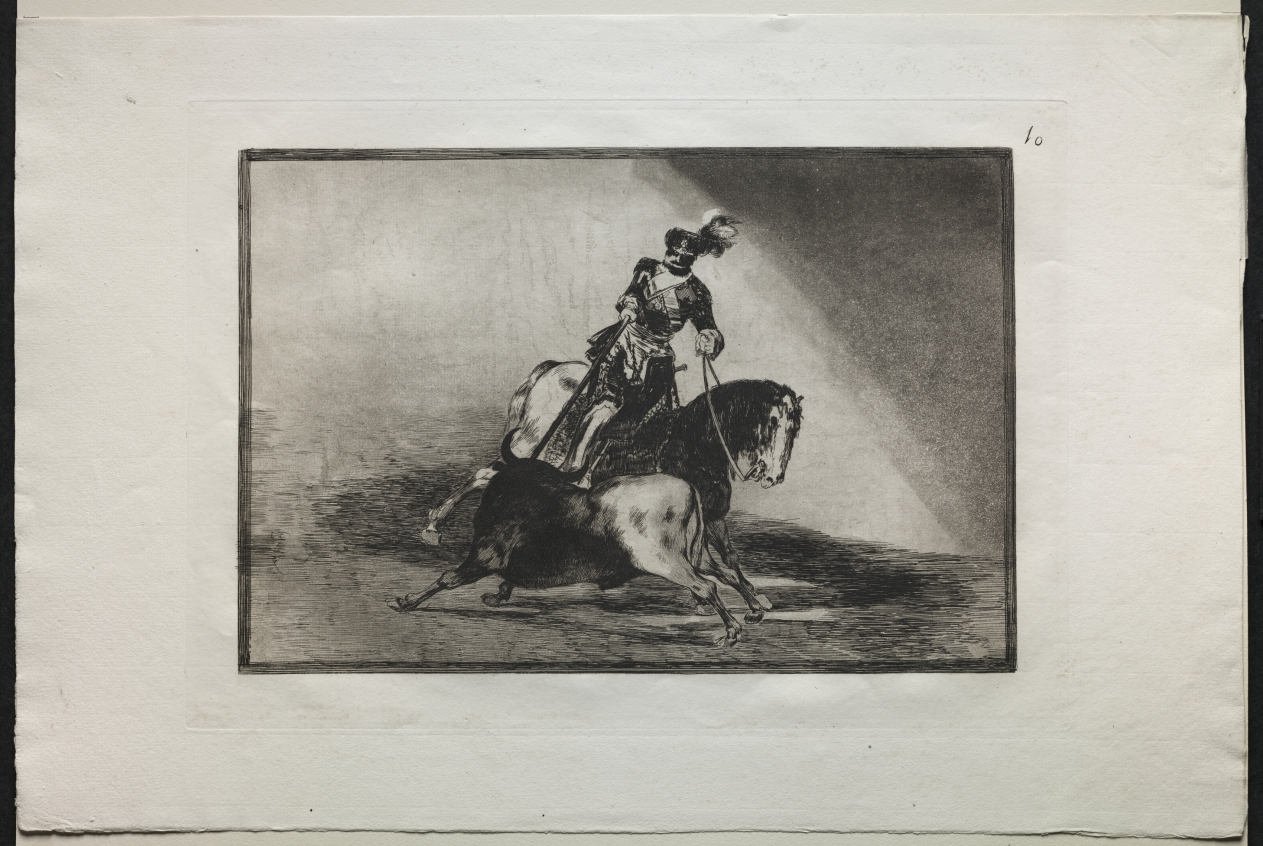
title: Bullfights: Charles V spearing a bull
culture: Spain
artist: Francisco de Goya (Spanish, 1746–1828)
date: 1816, printed 1876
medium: engraving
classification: Print